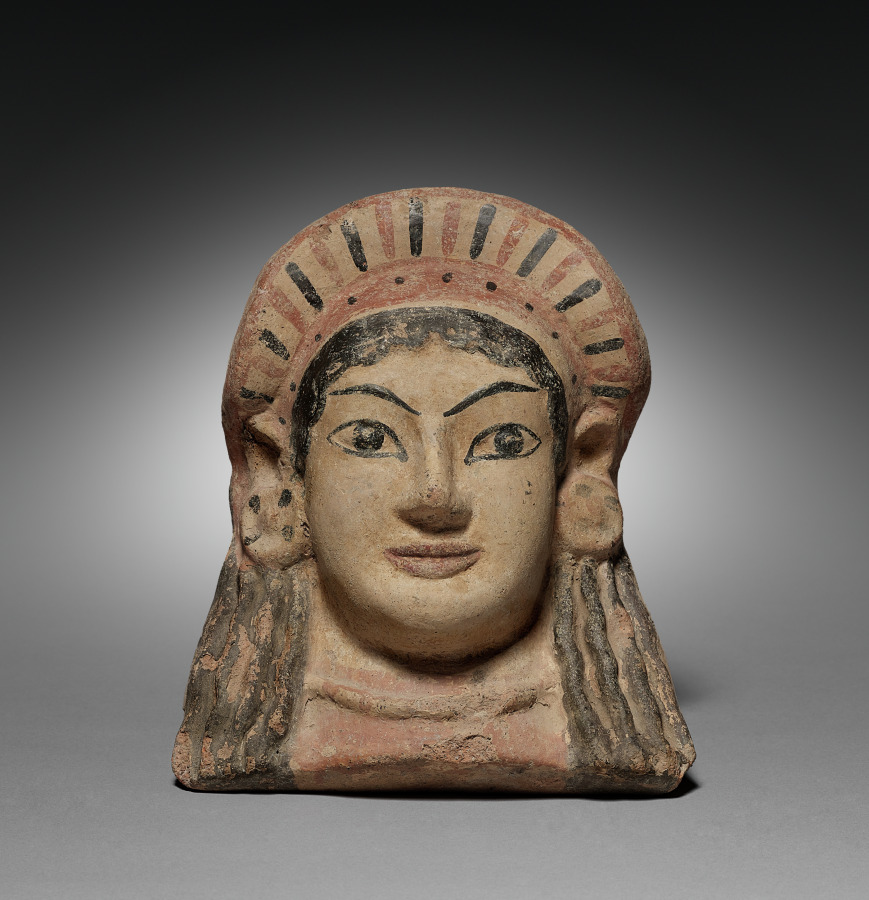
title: Antefix in the Form of a Maiden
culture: Etruscan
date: late 500s–early 400s BCE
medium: Painted terracotta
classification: Sculpture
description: Staring out with almond-shaped eyes and enigmatic smile, this brightly painted female head hides a rounded back made to serve an important function. She is a molded terracotta antefix, made to cap an open-ended roof tile along the sloping edge of a wooden building. Depending on the size of the structure it adorned, this antefix may have sat alongside dozens of others, likely all similar in form and painted decoration, and perhaps accompanied by additional polychrome architectural sculpture. Sometimes identified as maenads, the female followers of Dionysos (Etruscan Fufluns), such figures might also be nymphs or anonymous maidens.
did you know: Much Etruscan architectural sculpture was molded terracotta rather than carved stone.